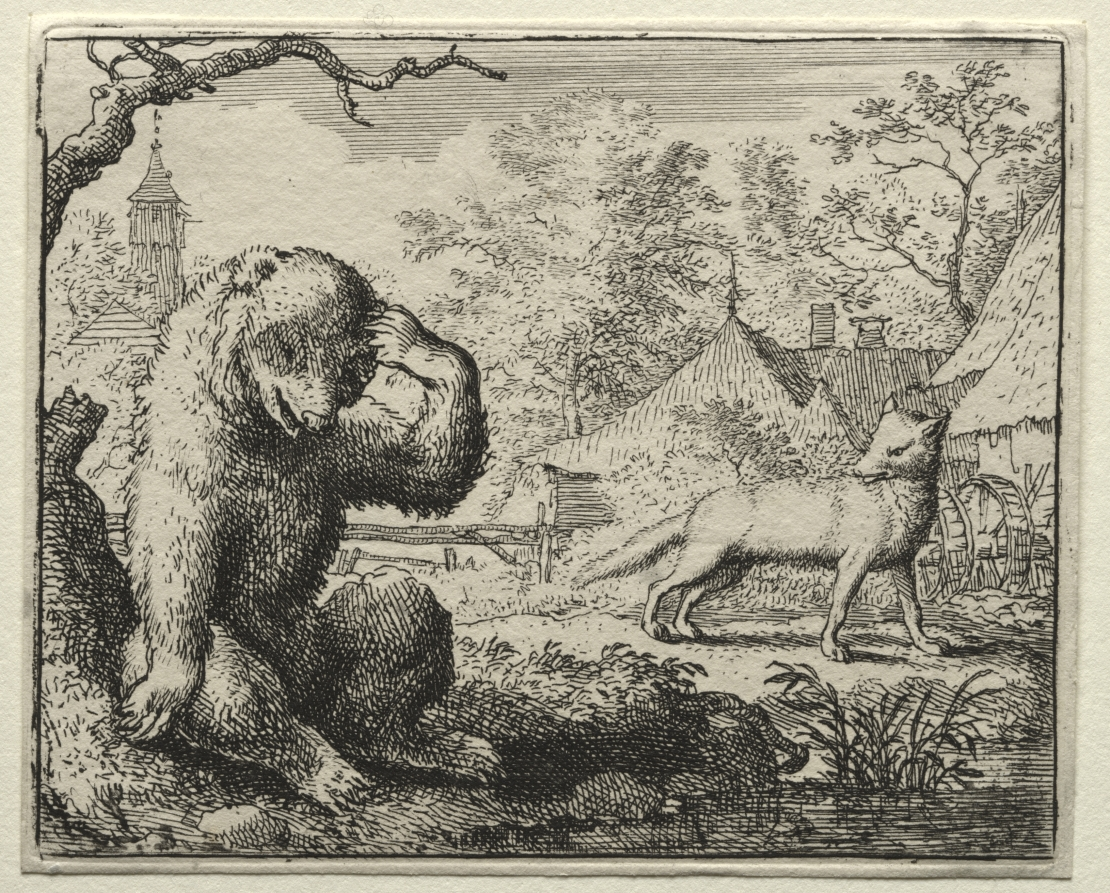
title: Reynard the Fox: Reynard Chides the Injured Bear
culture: Netherlands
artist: Allart van Everdingen (Dutch, 1621–1675)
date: 1650–75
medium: etching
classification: Print